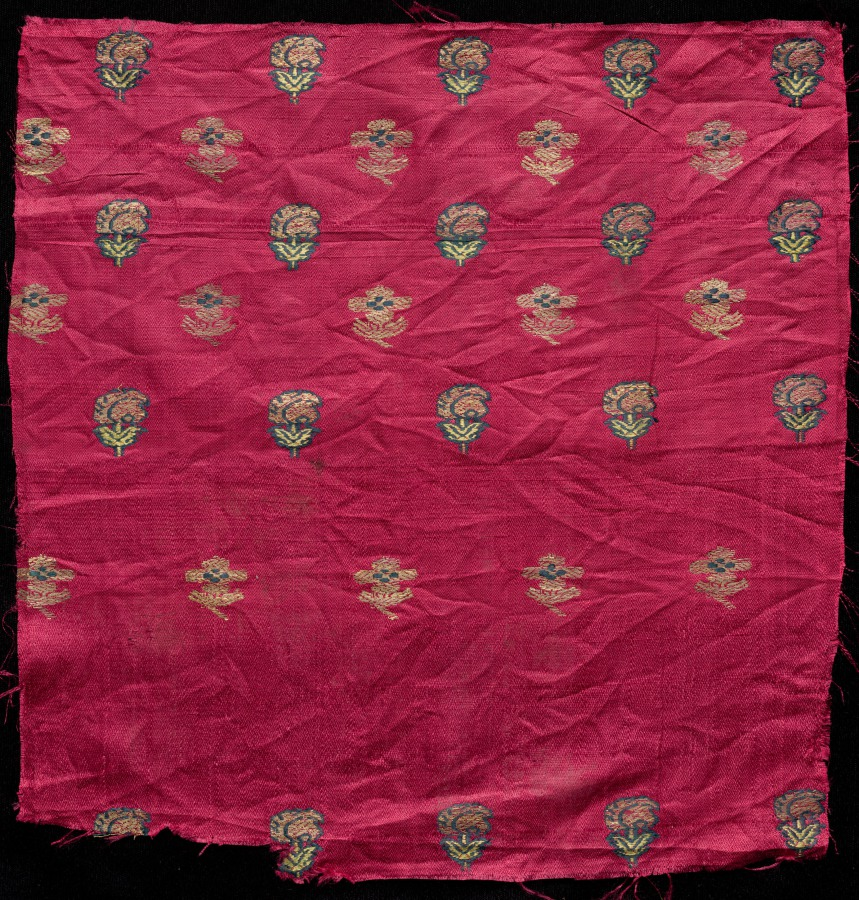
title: Fragment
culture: India, 19th century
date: 1800s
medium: brocade; silk and metal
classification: Textile